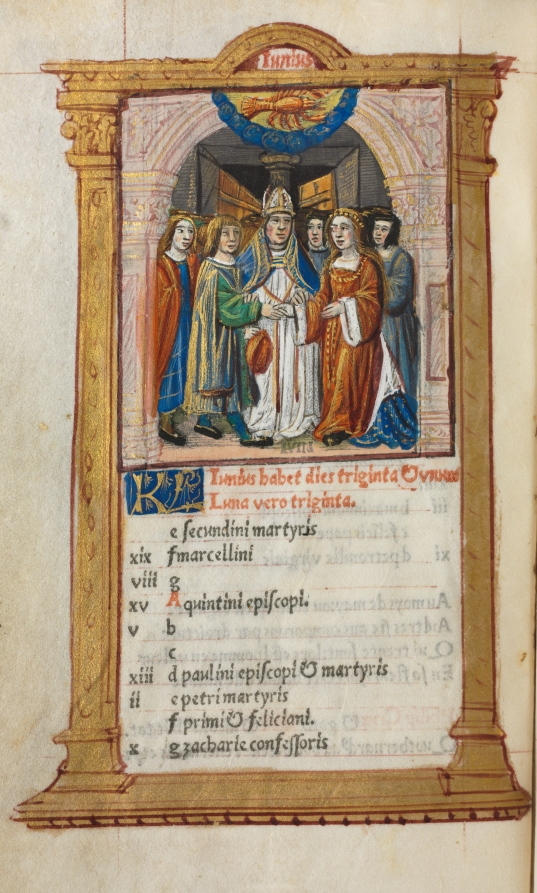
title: Printed Book of Hours (Use of Rome): fol. 7v, June calendar illustration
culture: France, Paris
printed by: Guillaume Le Rouge (French, Paris, active 1493–1517)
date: 1510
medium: 112 Printed folios on parchment, bound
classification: Bound Volume